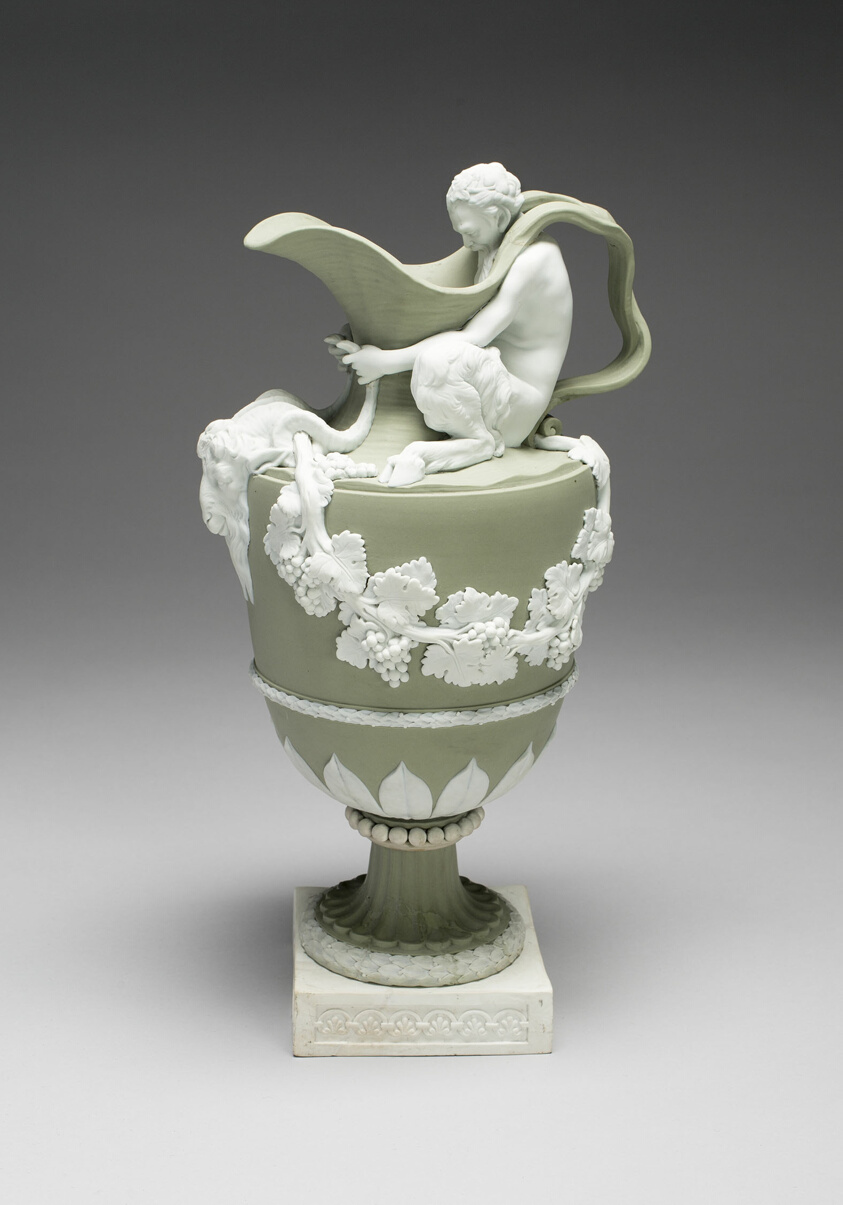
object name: Ceramics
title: Wine Ewer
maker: Wedgwood Manufactory; England, founded 1759; Etruria, Staffordshire, England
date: 1785/90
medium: Stoneware (jasperware)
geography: Burslem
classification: ewer (vessel); vessel; ornamental piece; stoneware; european decorative arts; ceramics